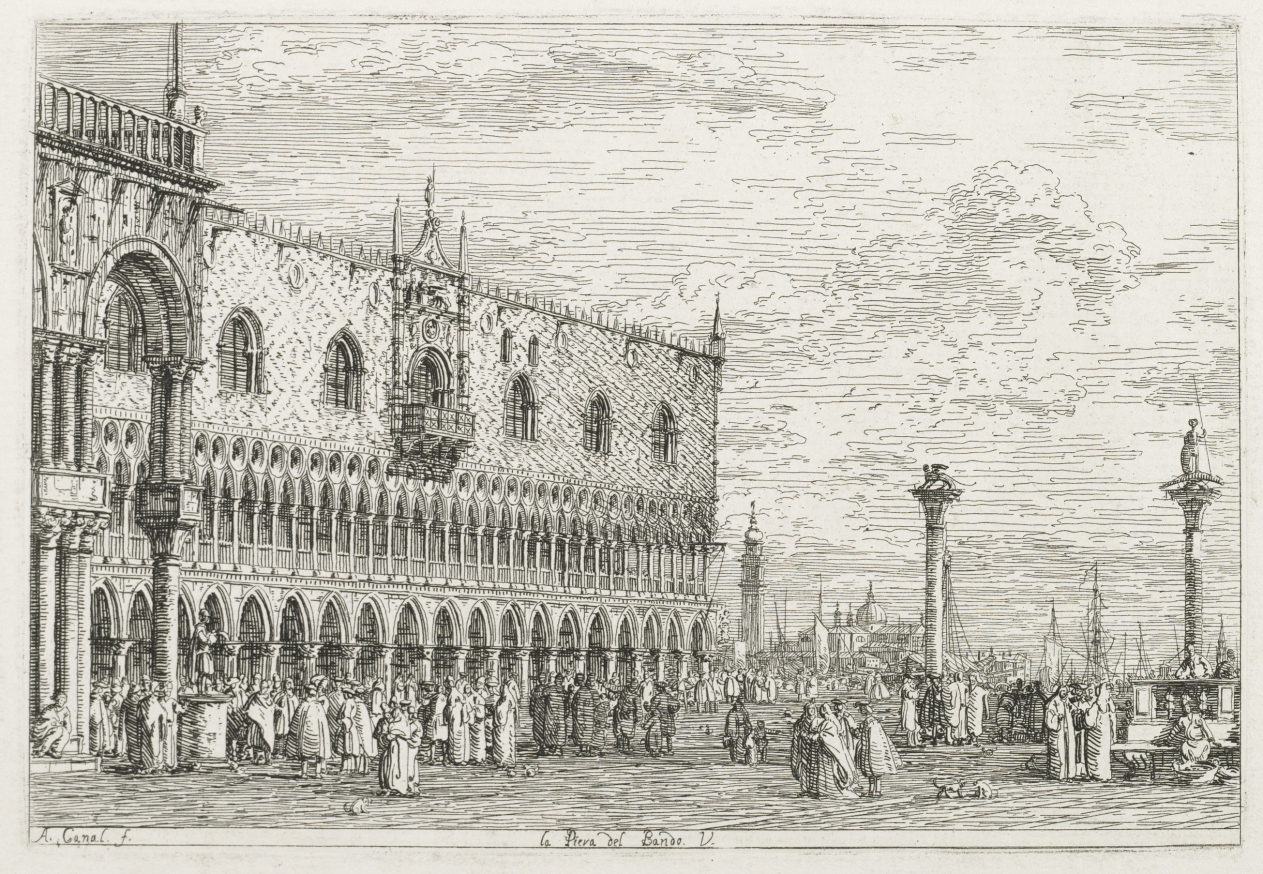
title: Views: The Stone of Proclamation at Venice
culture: Italy, Venice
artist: Antonio Canaletto (Italian, 1697–1768)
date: 1735–1746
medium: etching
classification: Print